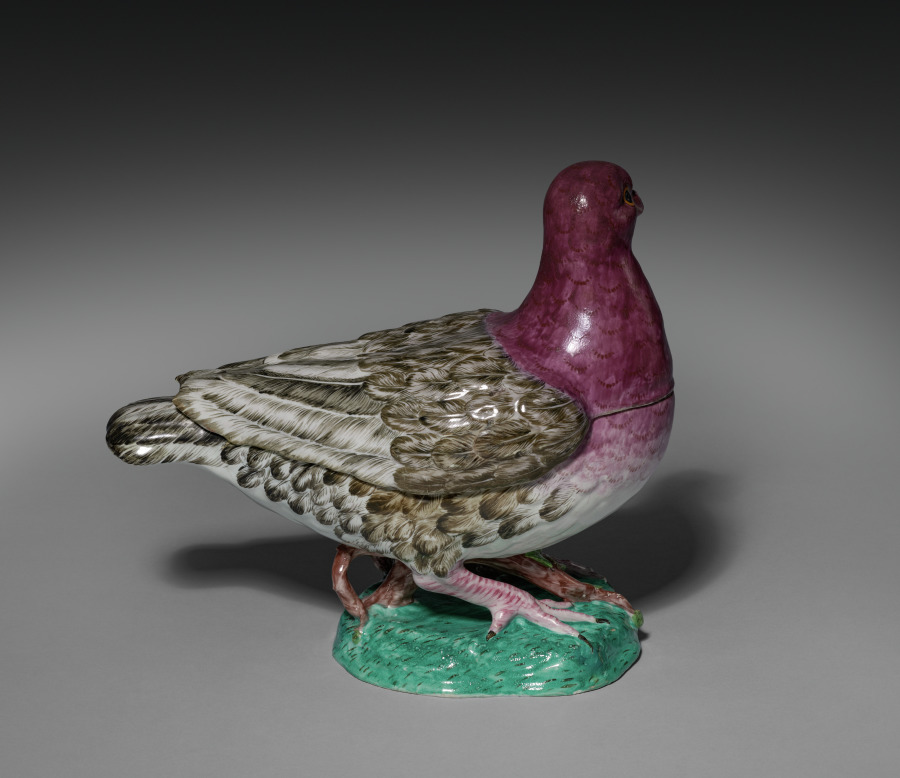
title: Covered Tureen in the Form of a Pigeon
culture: France, 18th century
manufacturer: Sceaux Factory (French, active 1748–66)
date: c. 1760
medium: Tin- glazed earthenware (faience) wth enamel decoration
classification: Ceramic